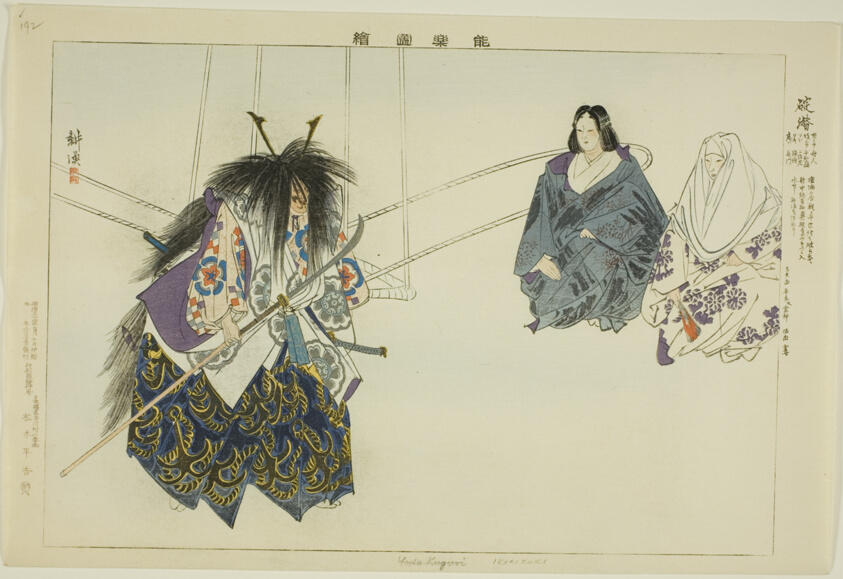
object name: Print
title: Ikari-Kazuki, from the series "Pictures of No Performances (Nogaku Zue)"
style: Japanese (culture or style)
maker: Tsukioka Kogyo; Japanese, 1869-1927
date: 1898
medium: Color woodblock print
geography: Japan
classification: woodblock print; print; asian art